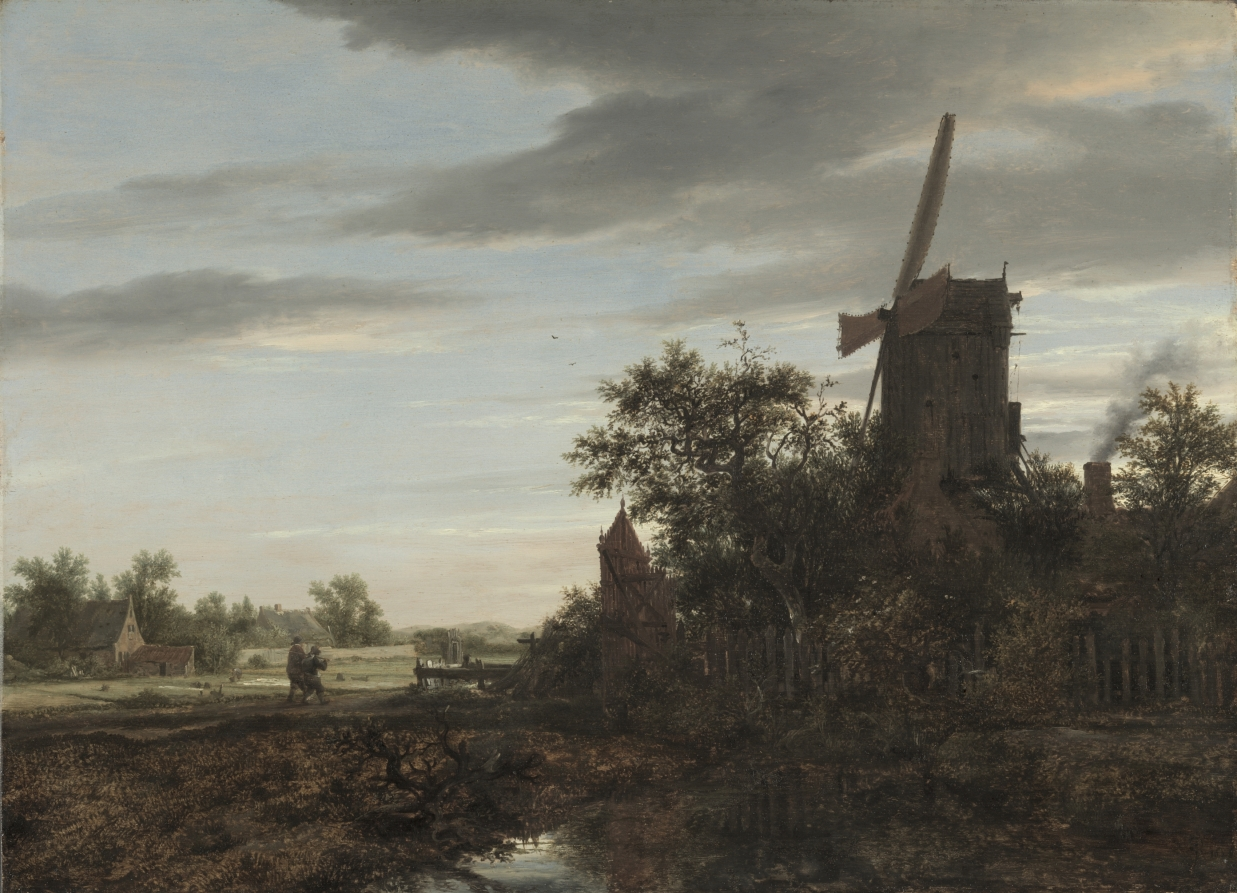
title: Landscape with a Windmill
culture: Netherlands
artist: Jacob van Ruisdael (Dutch, 1628/29–1682)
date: 1646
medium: oil on wood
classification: Painting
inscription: Signed lower right: "JvR 1646 [JvR in monogram]"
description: Even this early work by Jacob van Ruisdael—painted while he was still a teenager—shows his unique approach to landscape that made the simplest motifs seem grand and heroic. Dark forms are massed in the foreground, creating a stark contrast to the expansive, sunlit plain at left.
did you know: Look closely at the field across from the windmill: white linens are naturally bleached in the sun, a process that would have taken several months.